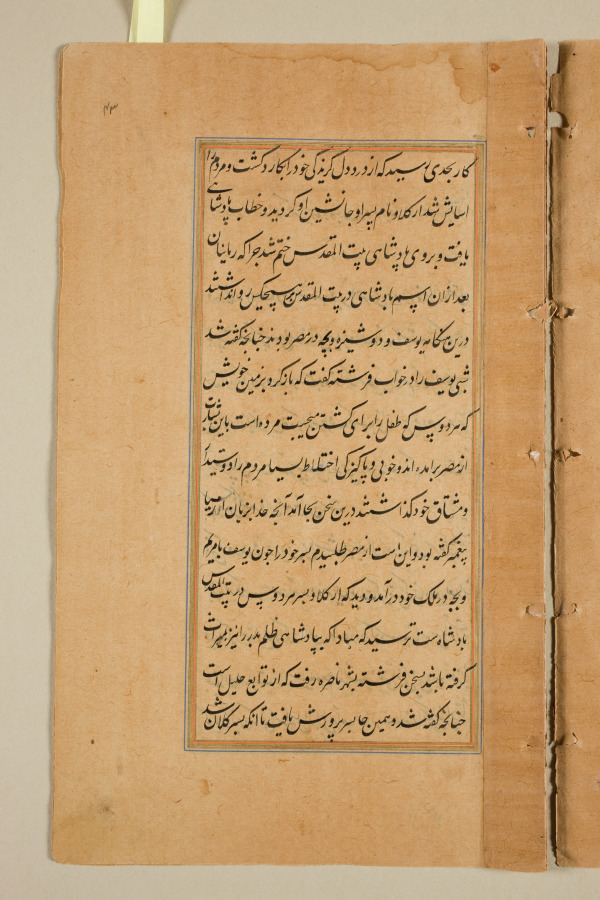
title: Text page from a Mirror of Holiness (Mir’at al-quds) of Father Jerome Xavier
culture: Mughal India, Allahabad, made for Prince Salim (1569–1627)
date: 1602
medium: Ink and gold on paper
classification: Manuscript